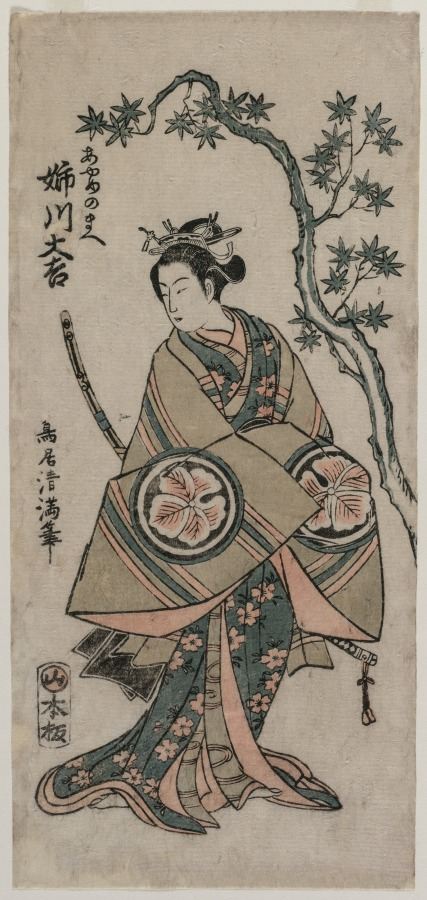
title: Anekawa Daisuke as Ayame-no-mae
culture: Japan, Edo period (1615–1868)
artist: Torii Kiyomitsu (Japanese, 1735–1785)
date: 1760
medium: color woodblock print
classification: Print